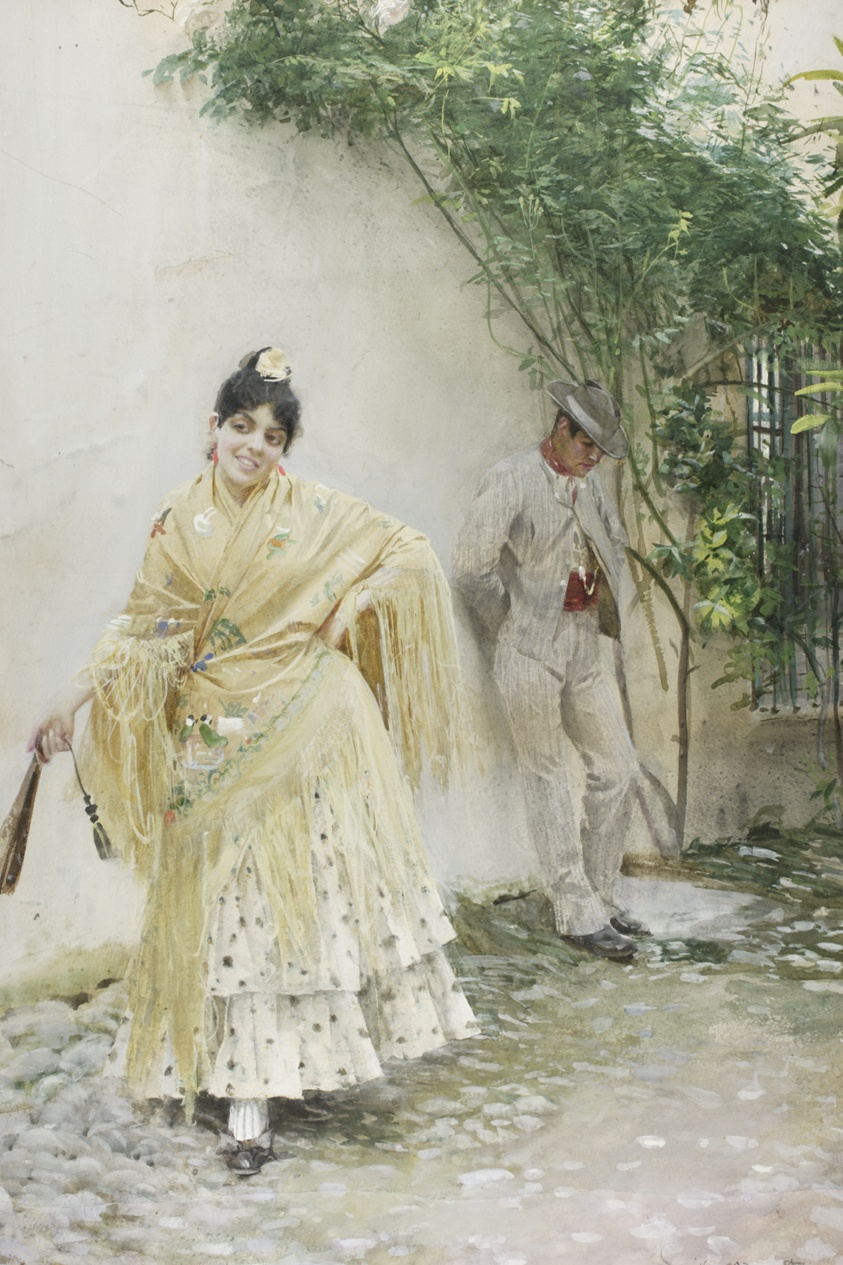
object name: Drawing and Watercolor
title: Seville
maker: Anders Zorn (Swedish, 1860-1920)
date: 1887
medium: Watercolor and gouache on paper, laid down on board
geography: Sweden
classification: drawings (visual works); prints and drawing